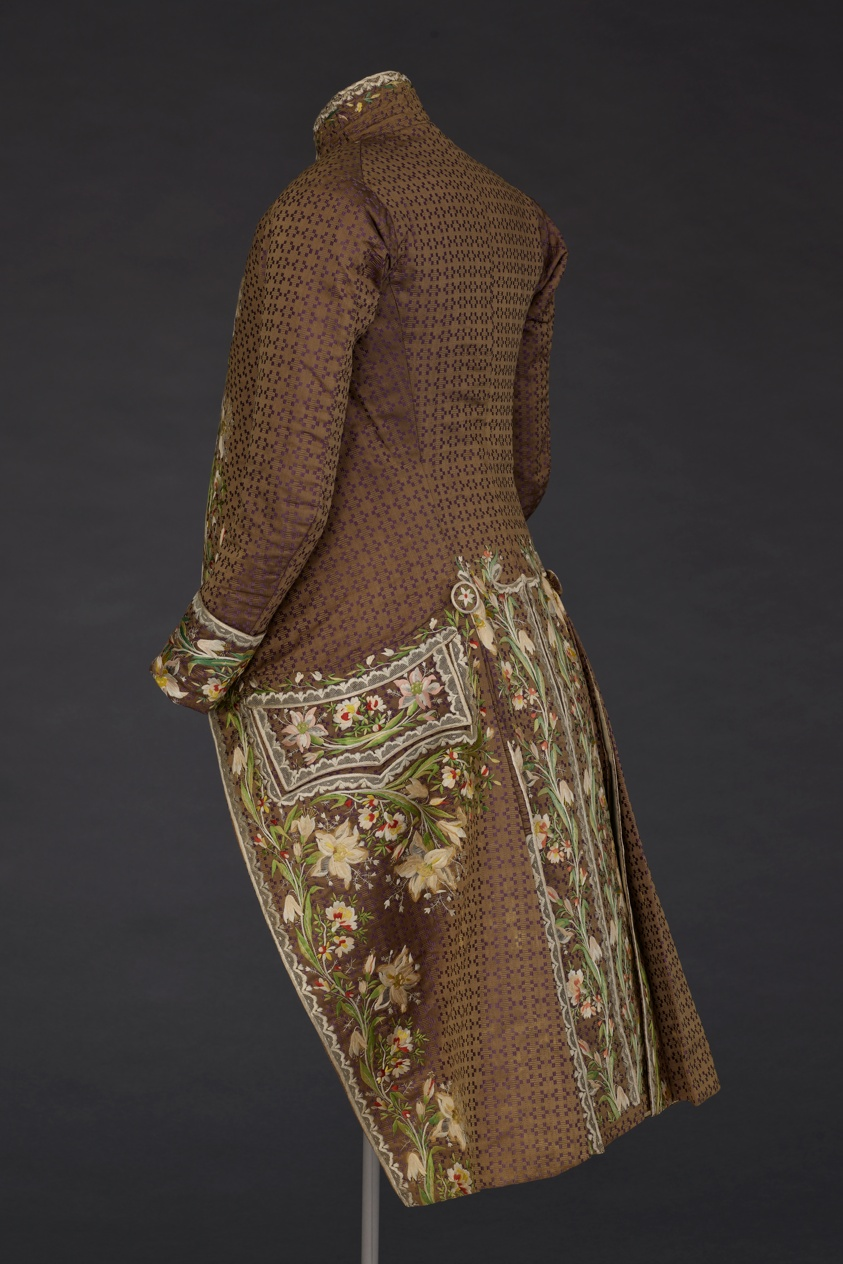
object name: Costume and Accessories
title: Man's Coat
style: 18th Century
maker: France, possibly Lyon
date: 1780s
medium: Silk, compound weave foundation; embroidered with silk threads in satin, stem and straight stitches; French knots, needle lace fillings, and slanted satin border block shading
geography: France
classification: textile; needlework (visual works); costume; dress (garment); clothing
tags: fashion, floral motifs, flowers